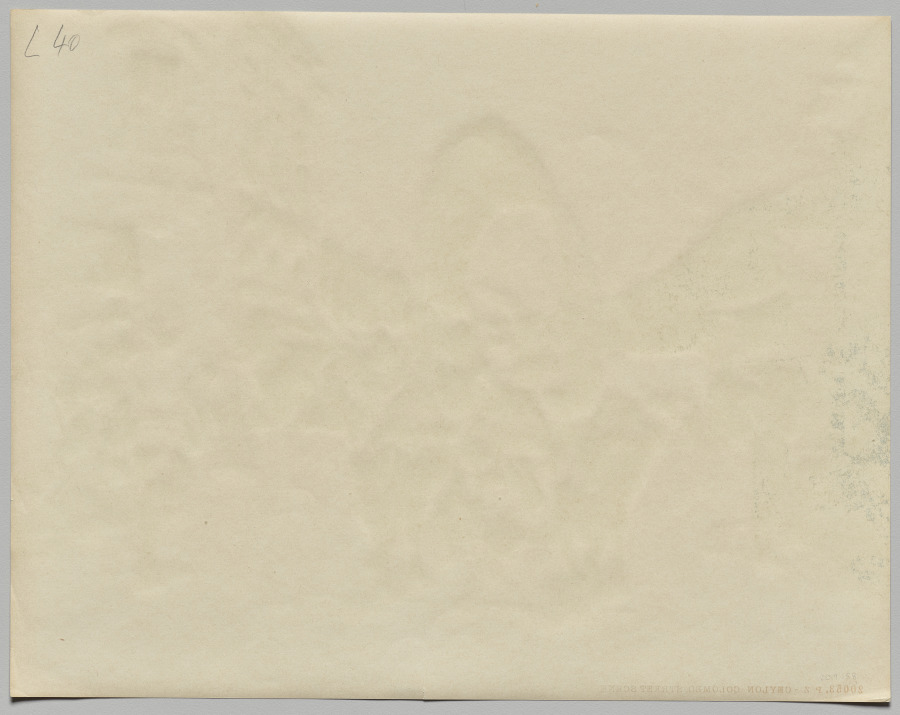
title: India. Ceylon. Colombo. Street Scene, after photo by Dr. Kurt Boeck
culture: India, 19th century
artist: Photoglob Co. (Zurich, active c. 1890–1910)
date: c. 1890–1910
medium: Photochrom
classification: Photograph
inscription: Imprinted in gold type on recto: “2003.P.Z-CALCUTTA. HARRISON ROAD.I”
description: To make a photochrom, a photographic negative was transferred onto a lithographic stone, then printers created a minimum of six and up to fifteen different stones, each with a single color of ink, which were printed atop the black-and-white image. The printers creating the colors had never seen the original locale. Photochroms were popular from the 1890s into the 1910s and were most often collected in albums or framed and hung on the wall.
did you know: This color image was made from a black-and-white negative.